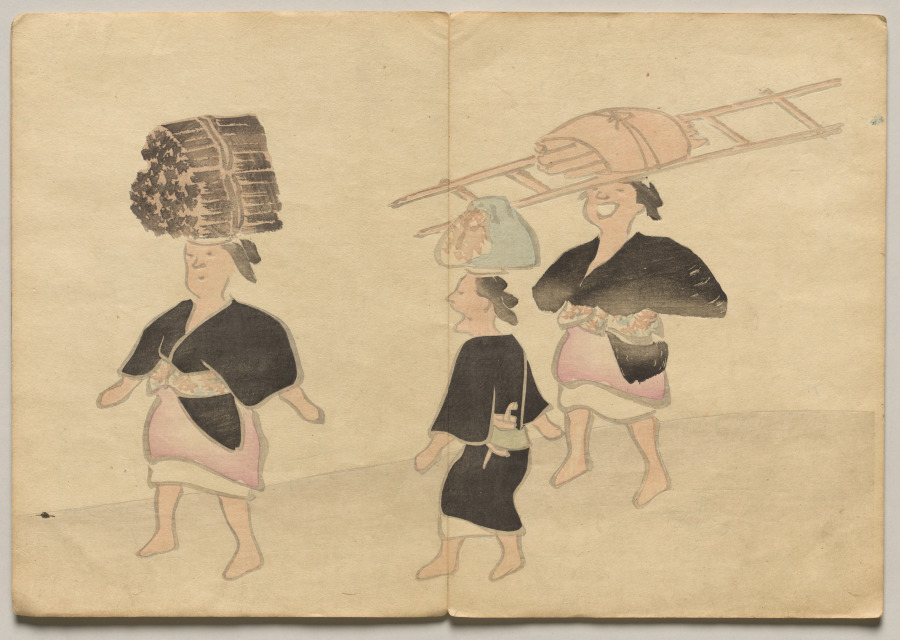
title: Scene from The Kōrin Picture Book (Volume 1)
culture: Japan, Edo period (1615–1868)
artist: Nakamura Hōchū (Japanese, d. 1819)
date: 1800s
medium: color woodblock printed book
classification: Bound Volume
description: Ogata Korin (1658-1716) was one of the most admired artists of Rimpa, or "decorative school painting." These books by the charming later-generation Rimpa artist Hochu record Korin's inventive designs.